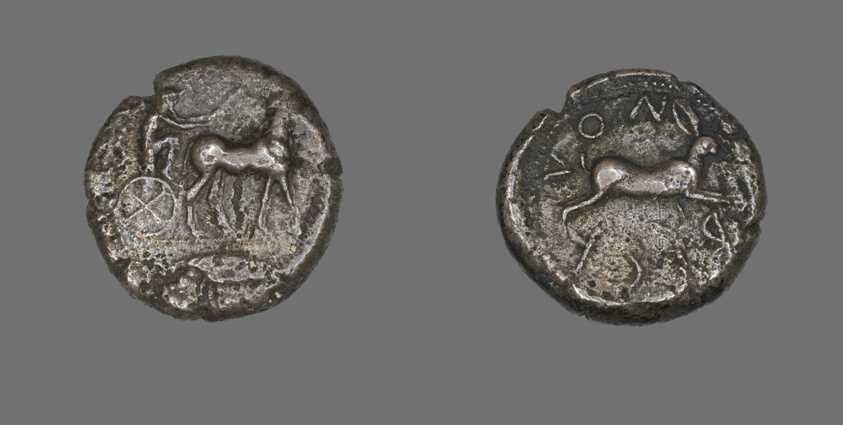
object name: Coin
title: Tetradrachm (Coin) Depicting a Charioteer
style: greek, ancient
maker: Greek; Rhegium, Italy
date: 5th century BCE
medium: Silver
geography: Reggio di Calabria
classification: coin; ancient art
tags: Chariots